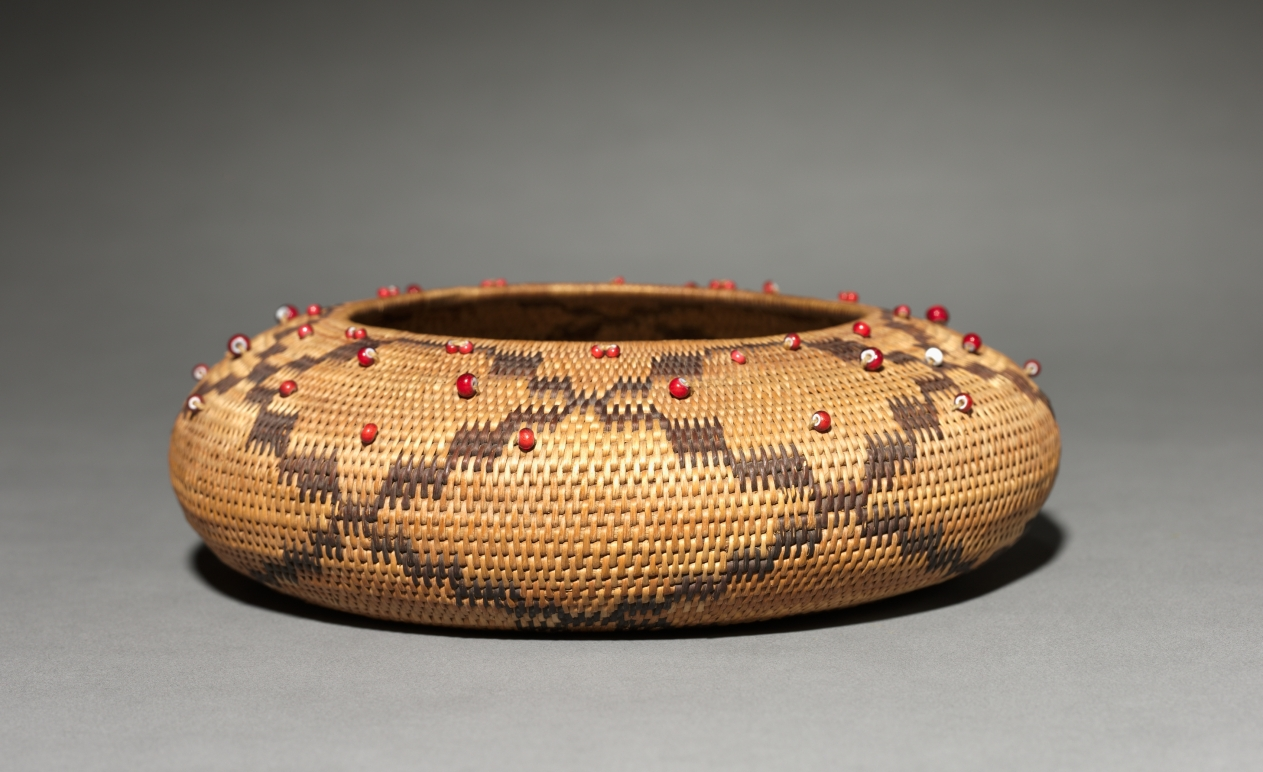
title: Trinket Bowl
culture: California, Pomo, Late 19th- Early 20th century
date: c. 1895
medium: Bulrush, Sedge, with beads; coiled (1 rod)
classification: Basketry